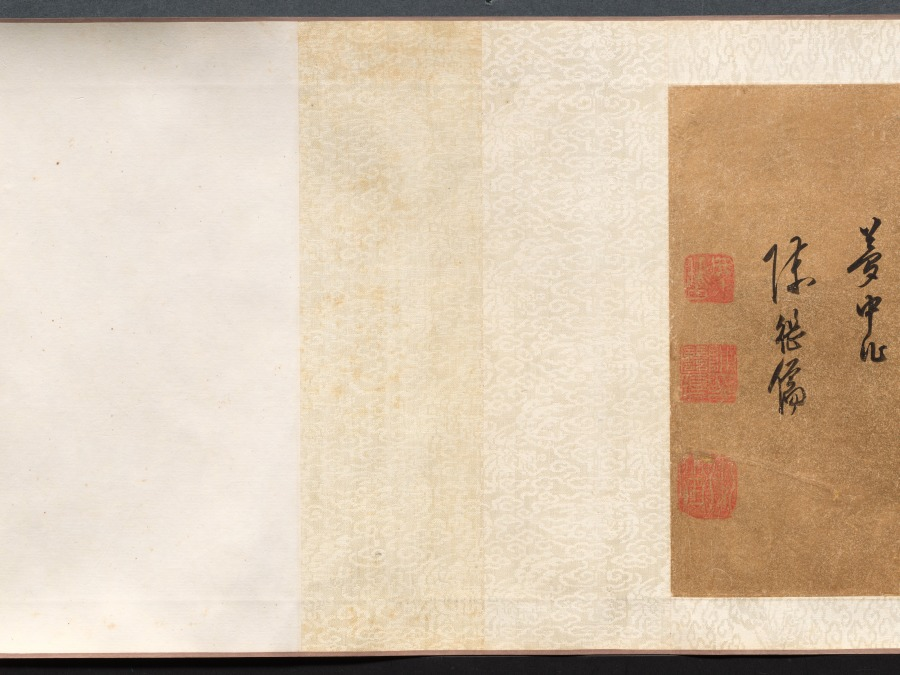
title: Four Poems: Calligraphy in Cursive Script (xingshu)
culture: China, Ming dynasty (1368–1644)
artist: Chen Jiru (Chinese, 1558–1639)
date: 1500s-1600s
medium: handscroll; ink on gold speckled paper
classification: Calligraphy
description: Written in graceful calligraphy with well-composed characters, the artist communicates his thoughts and state of mind in four poems. Characters written in dark, thick strokes convey rhythm, and indicate the moment after the writer had paused to recharge his brush with ink. Chen Jiru was a native of Huating (modern Shanghai). His calligraphy style resembles that of his friend, influential calligrapher Dong Qichang (1555–1636). Unlike Dong, Chen did not pursue government service: he burned his Confucian robes, declined a summons to serve at court, and immersed himself in literature, calligraphy, and painting.